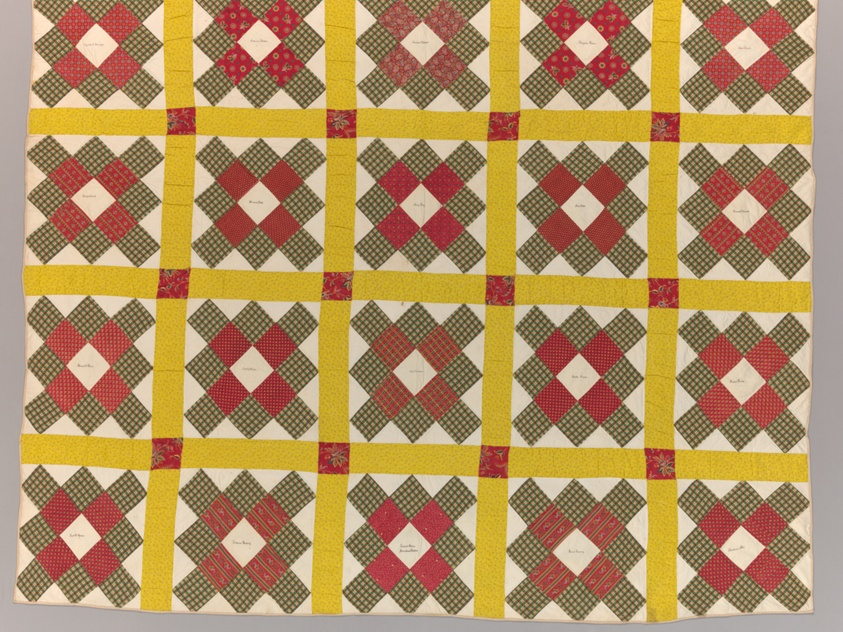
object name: Textile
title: Bedcover ("Album Patch" or "Signature" Quilt)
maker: Possibly Hunderdon County, New Jersey, United States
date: 1847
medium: Cotton, plain weaves; printed; quilted; backed and edged with cotton, plain weave; pieced; printed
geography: United States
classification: needlework - quilt; textile